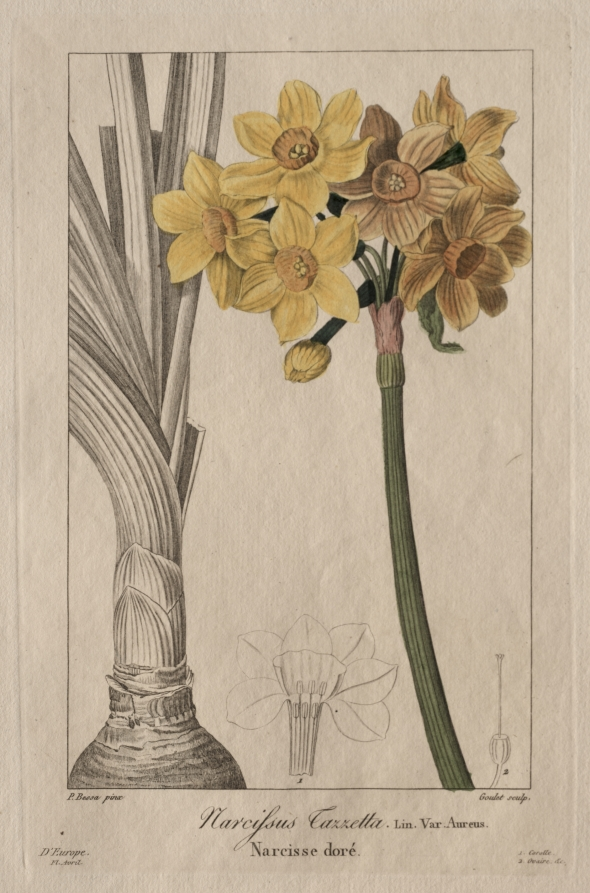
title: Flore des Jardiniers, Amateurs et Manufacturiers: Polyanthus or Cluster Narcissus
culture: France, 19th century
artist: Pancrace Bessa (French, 1772–1846)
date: 1836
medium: engraving, hand-colored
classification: Print